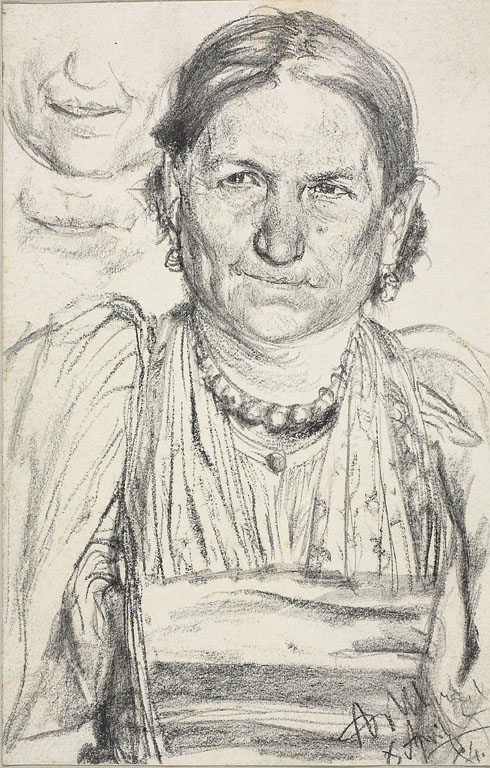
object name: Drawing and Watercolor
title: Portrait of a Peasant Woman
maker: Adolph Menzel; German, 1815–1905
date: 1884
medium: Charcoal and graphite on paper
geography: Germany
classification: graphite; drawings (visual works); prints and drawing